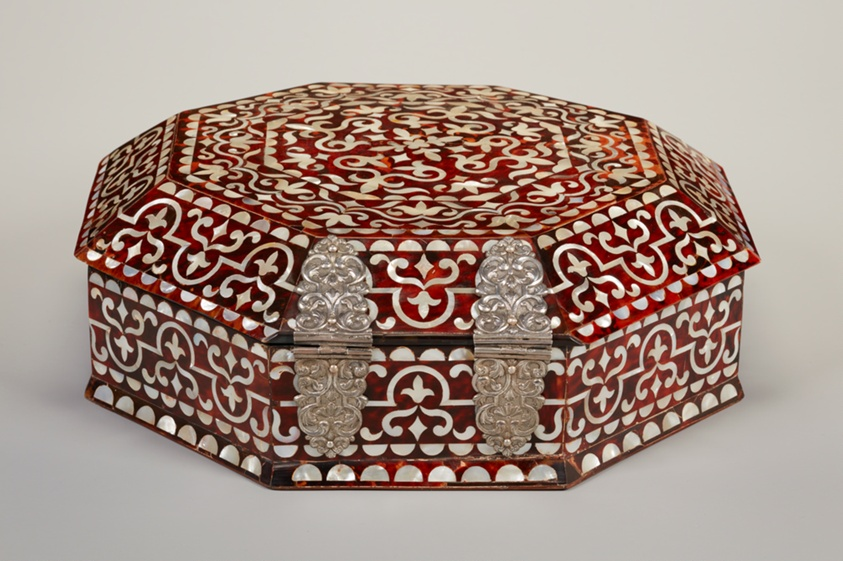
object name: Decorative Arts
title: Coffer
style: 18th Century, Baroque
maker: Peruvian; Probably Lima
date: c. 1750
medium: Wood, tortoiseshell, mother-of-pearl, silver, glass, and paint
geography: Lima department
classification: box; inlay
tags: box, coffer